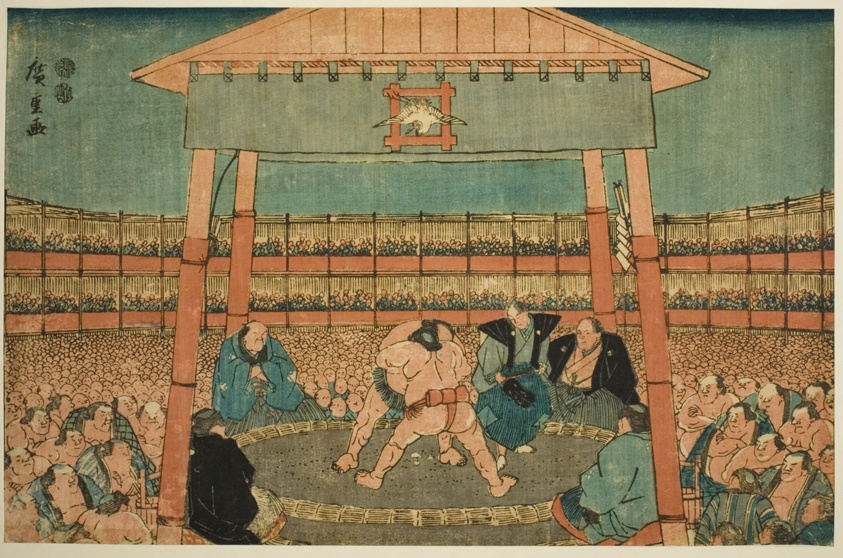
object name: Print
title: Sumo Match in the Precints of the Ekoin Temple (Ekoin keidai sumo no zu), from the series "Ryogoku in the Eastern Capital (Toto Ryogoku)"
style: Japanese (culture or style)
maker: Utagawa Hiroshige 歌川 広重; Japanese, 1797-1858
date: c. 1847/52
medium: Color woodblock print; oban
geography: Japan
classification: woodblock print; print; asian art